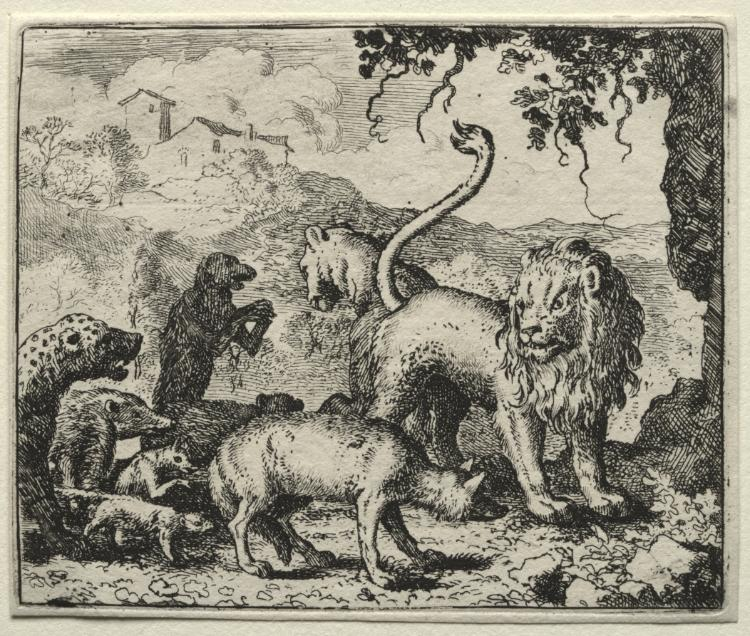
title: Reynard the Fox: First Complaint of the Wolf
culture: Netherlands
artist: Allart van Everdingen (Dutch, 1621–1675)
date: 1650–75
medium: etching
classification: Print